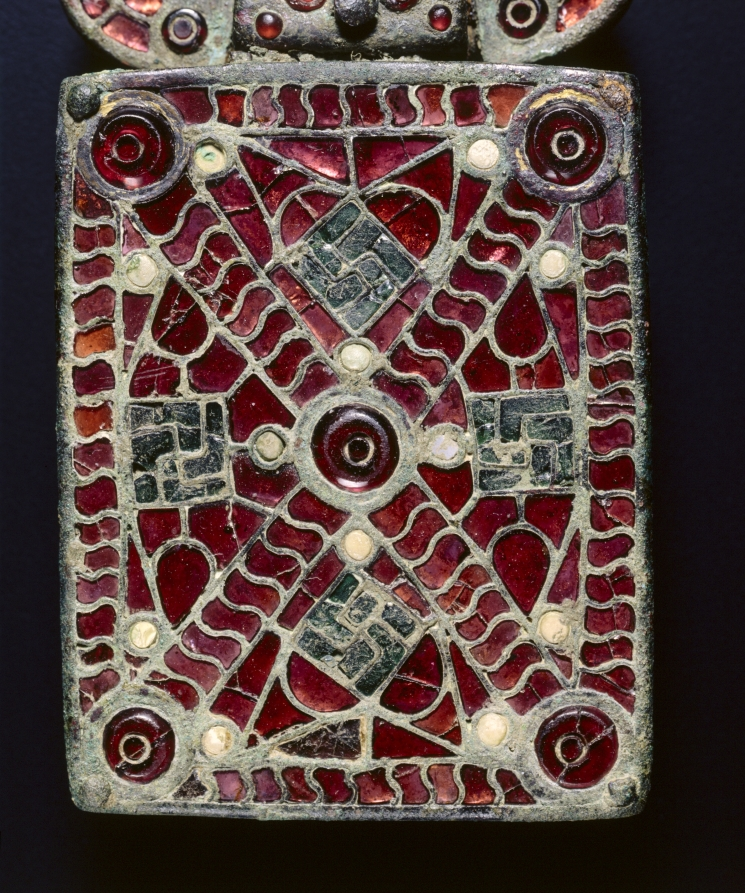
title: Belt Buckle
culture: Visigothic, Spain, Migration Period, 6th century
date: c. 525–560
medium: bronze with garnets, glass, mother of pearl, gold foil, traces of gilding; bronze and glass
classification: Jewelry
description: The art of the European Migration Period (3rd-7th centuries AD) is almost exclusively one of personal adornment-a portable art that followed men and women to their graves. Belt buckles with large rectangular attachment plates have been discovered in cemeteries across the Iberian Peninsula-now occupied by Spain and Portugal-from the period of Visigothic occupation (about AD 412-711). Their decoration varies. Finer examples, like this one, are distinguished by brilliantly inlaid semi-precious stones and colored glass. Garnets were especially prized in Visigothic society for use in cloisonné jewelry. The technique involved the fitting of carefully cut pieces of polished garnet into an intricate grid of compartments, or cloisons. This buckle is so densely inlaid with garnets that it presents a virtual "carpet" of red to the eye. These large Visigothic buckles are strikingly uniform in shape yet endlessly varied in surface design, perhaps a sign that they expressed the personal identities of their original owners. Grave excavations have shown that belt buckles of this type were made for women.